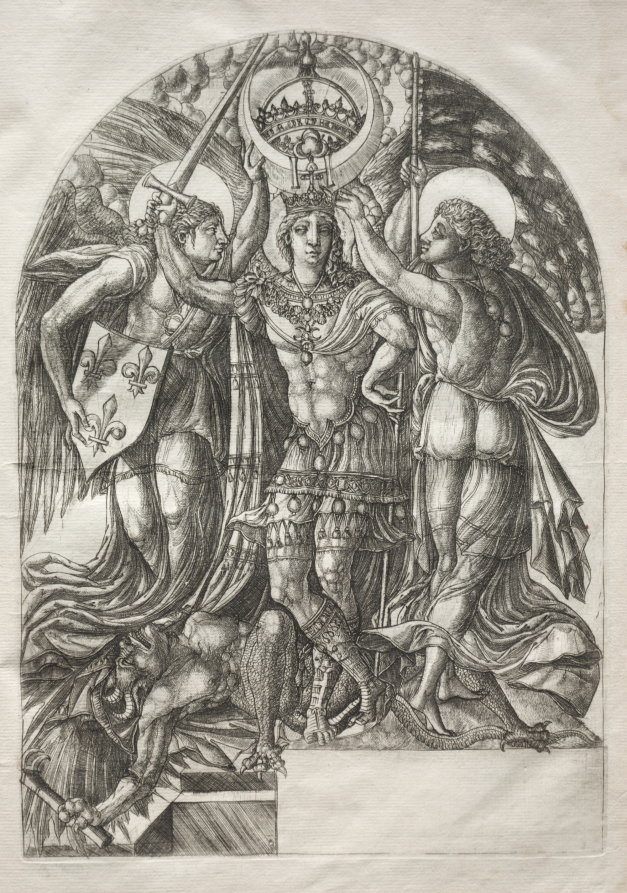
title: Henry II, King of France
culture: France, 16th century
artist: Jean Duvet (French, 1485–1561)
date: before 1561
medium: engraving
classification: Print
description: This print is part of a bound volume of works illustrating the a narrative of the Apocalypse, taken from the Revelation of Saint John in the Bible. The 23 engravings in the series occupied the artist for a number of years and represent his greatest artistic achievement. The museum's volume is one of only seven known complete sets. Jean Duvet was one of the first major printmakers in France and one of the most original artists of the 1500s. Although he worked mostly in the provincial city of Langres, he became aware of Italian art through the circulation of prints—notably those of Marcantonio Raimondi. His solidly modeled human figures reflect the influence of the Italian High Renaissance. Duvet, however, developed an idiosyncratic, highly artificial style with crowded compositions that ignore rational space in favor of ornamental surface patterns.